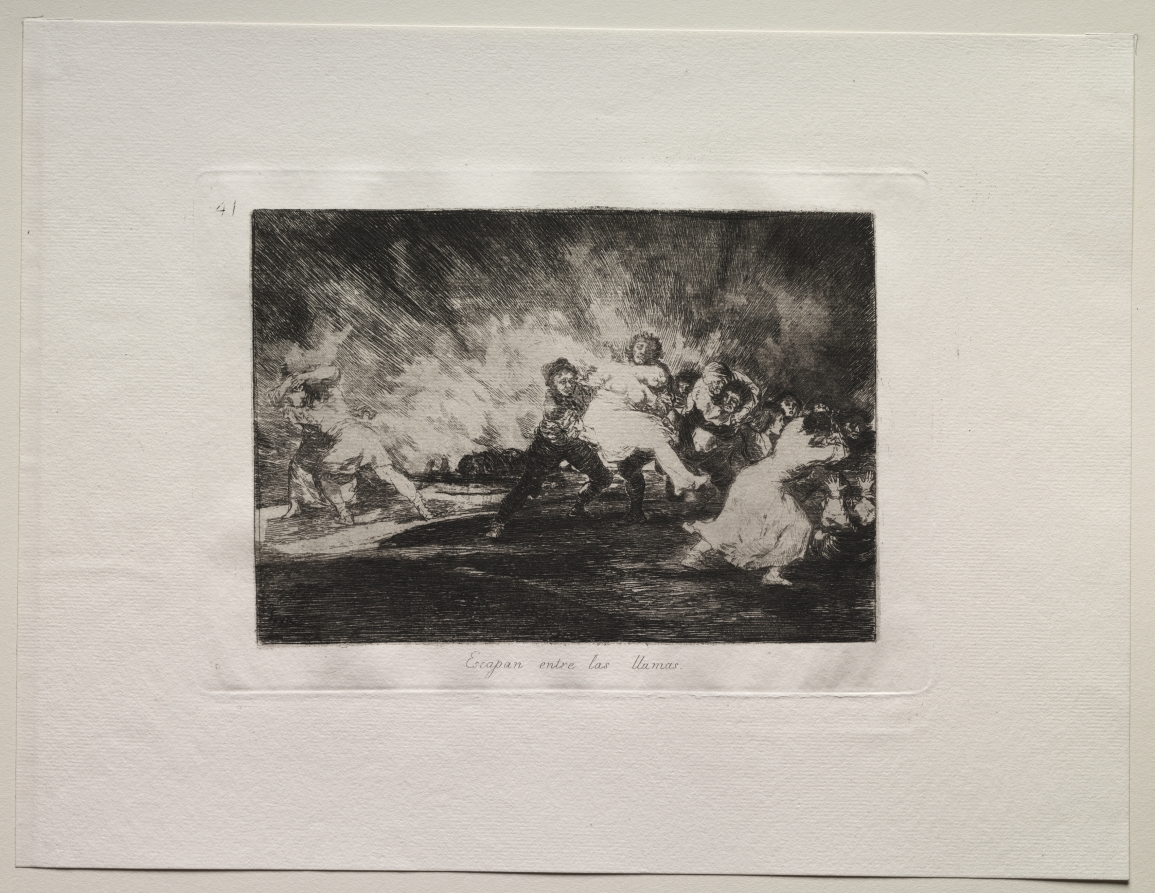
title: The Horrors of War: They Escape Through the Flames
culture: Spain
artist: Francisco de Goya (Spanish, 1746–1828)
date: c. 1810–20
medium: etching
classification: Print